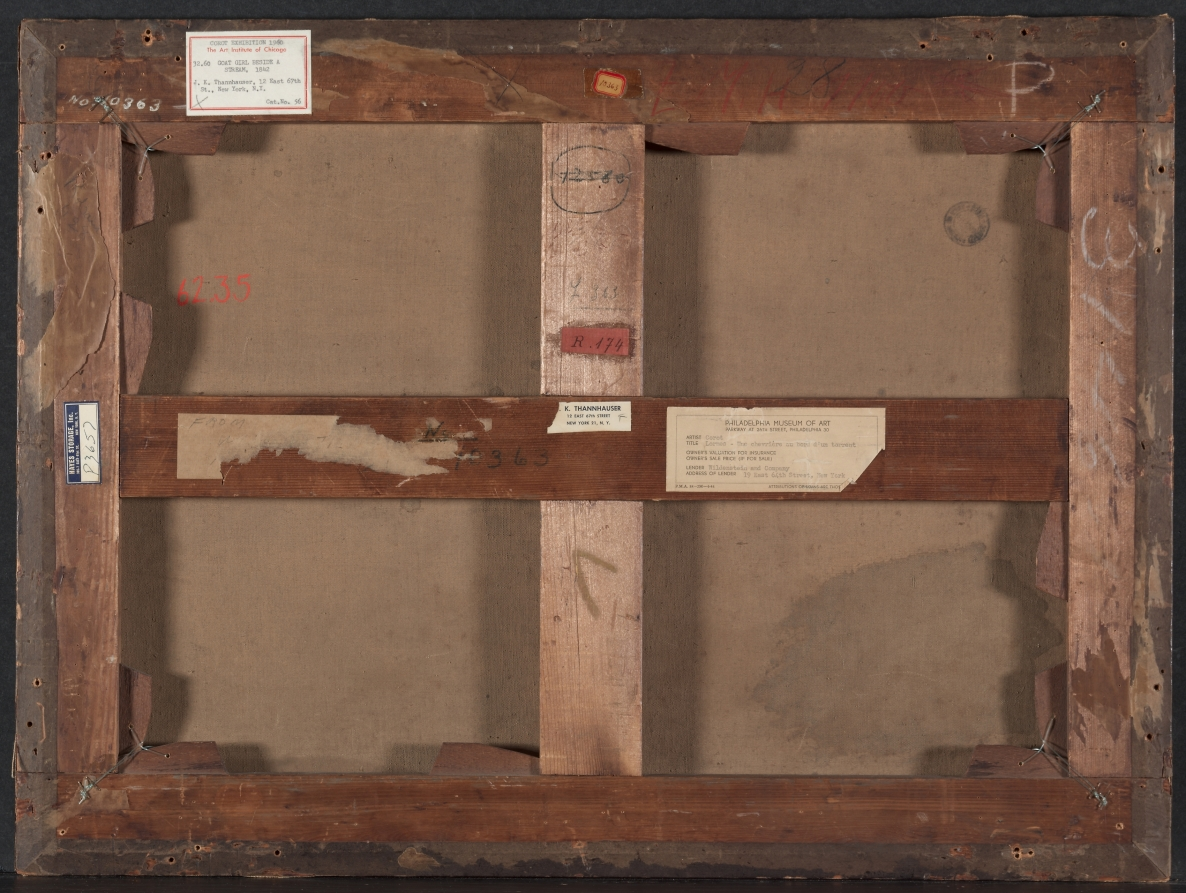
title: Lormes: Goat-Girl Sitting Beside a Stream in a Forest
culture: France, 19th century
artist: Jean Baptiste Camille Corot (French, 1796–1875)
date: 1842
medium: oil on fabric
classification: Painting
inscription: Signed lower right: Corot 1842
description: Camille Corot painted this charming woodland scene during the summer of 1842 while visiting Lormes, a small village in the Morvan region of Burgundy. The area was known for its dense woodlands and picturesque falls. Corot included a seated goat shepherd leaning against a curving tree trunk, but instead of commanding the viewers attention, the human presence is overshadowed by the dynamic interlacing forms of the tree trunks and branches that stretch up and across the canvas.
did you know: Claude Monet once said: "There is only one master here—Corot. We are nothing compared to him, nothing."